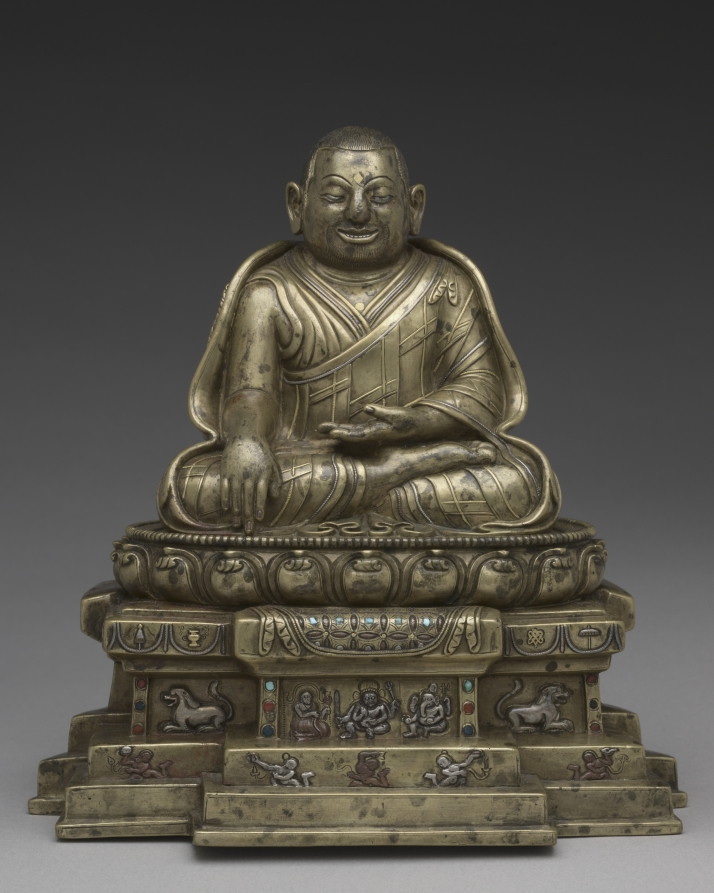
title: Portrait of Phagmo Drupa Dorje Gyalpo (1110–1170)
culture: Central Tibet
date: 1200s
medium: gilt bronze with gold, silver, copper, turquoise, lapis, and coral inlay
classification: Sculpture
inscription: / / Na mo 'ghu ru / / Ngan lam ban chung bdag gis ni / / bla ma Rin chen sku bzhengs pa yi / / bsod nams 'di yi byin brlabs kyis / / 'gro drug sdug sngal zad par shog / / Translation: "Salutations to the master ! May the sufferings of the six kinds of beings be appeased through the blessing of merit gained by me, the little monk of Ngan.lam, in having this statue of the Lama Rin.chen made."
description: This portrait statue depicts the first monastic leader of the prominent Buddhist monastery of Densatil, an influential early leader of the Tibetan Buddhist monastic order called Kagyu, famous for his views on the importance of meditation. He sits on a lotus pedestal and lion throne, like a Buddha, and his hand positions (mudras) communicate that meditation leads to enlightenment.